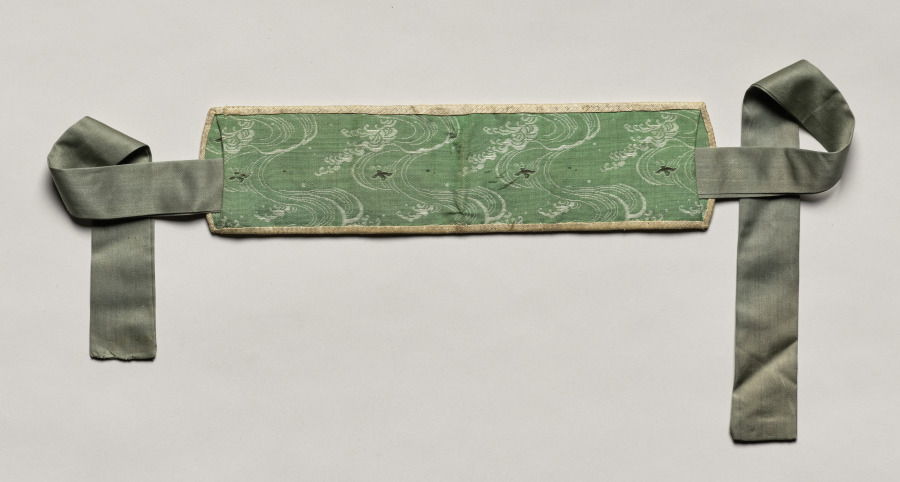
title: Sash for a Firefighter's Suit (Kaji shōzoku)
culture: Japan, Edo period (1615–1868)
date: late 1700s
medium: Wool (rasha); applique and silk and gold thread cord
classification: Textile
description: Wood architecture in densely populated areas made firefighting a frequent occurrence in the Edo period (1615–1868). Jackets made of leather or wool offered firefighters protection against the flames. Wool was imported from Europe. The jacket's triple ring crest in white is of the “three alternating rings” (mitsurin chigai) type framed in a tortoise shell (kikko) motif, and identified the house with which the wearer was affiliated.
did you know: Wool has self-extinguishing properties that protect the wearer from fire.